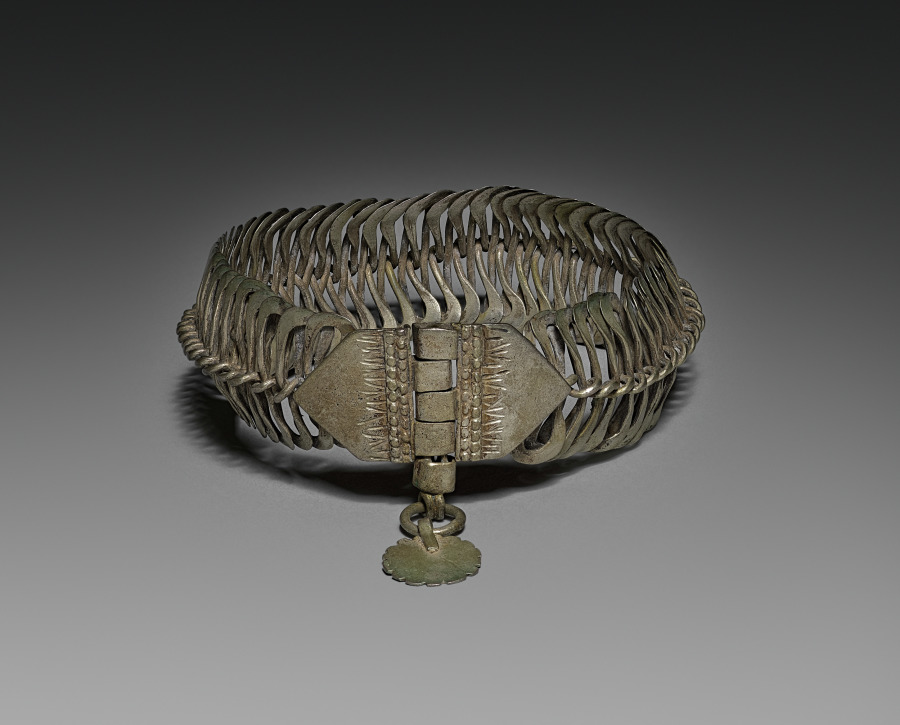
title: Bracelet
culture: India (?)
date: 1800s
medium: silver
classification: Jewelry